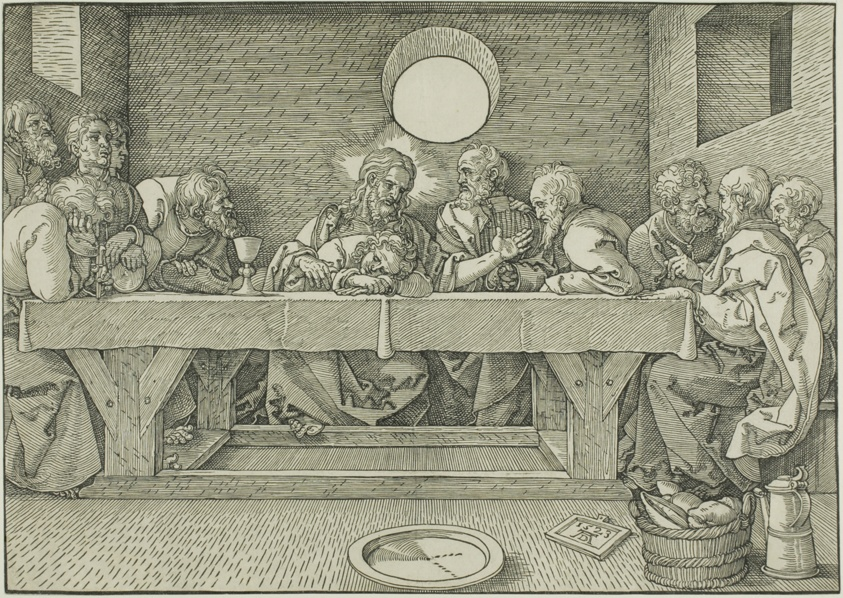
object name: Print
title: The Last Supper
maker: Albrecht Dürer (German, 1471-1528)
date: 1523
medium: Woodcut in black on ivory laid paper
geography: Germany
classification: woodcut; print; prints and drawing; paper